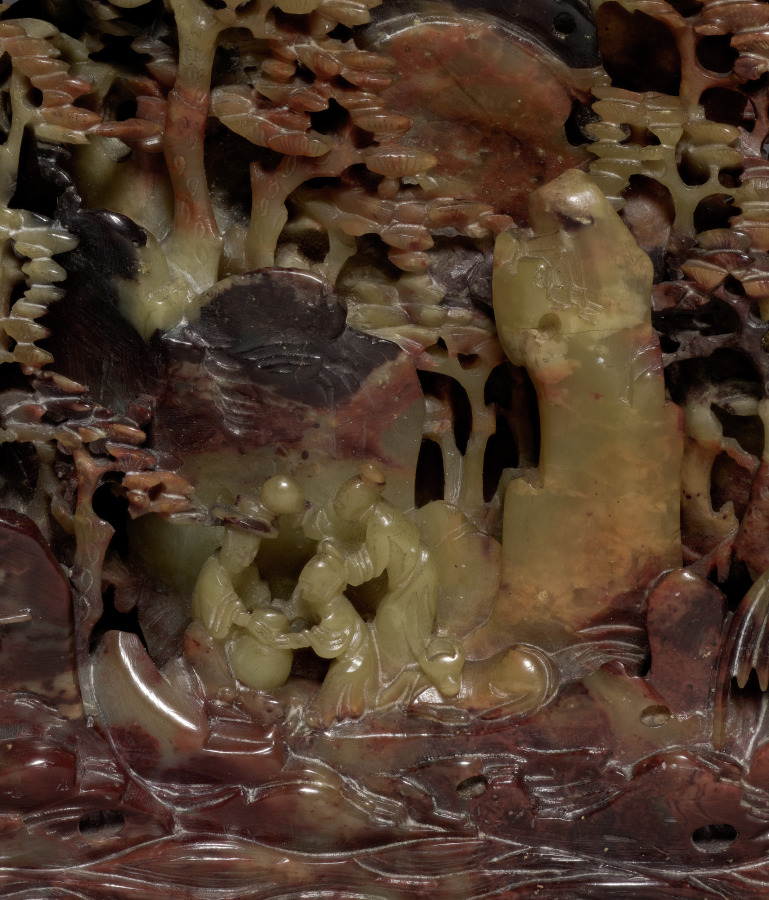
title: Landscape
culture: China, Qing dynasty (1644-1911)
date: 1644–1911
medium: soapstone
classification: Stone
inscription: 石門洞天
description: A mountain scenery surrounded by water and fish is meticulously carved out of soapstone, with a pond, bridge, waterfall, and temple front in its center. The unidentified figure scene on the left includes an ox and a man wearing what appears to be a Korean hat. A Buddha figure hidden in the depth of the temple can be glimpsed from the backside. The inscribed pillar on the right reads “Stonegate Cave to Heaven (shimen dongtian)”. Indentations all over the stone suggest that the miniature mountain was once adorned with precious stones and metal, presumably representing an earthly paradise to which one could escape in one’s mind and imagination.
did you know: A waterfall plummets down the cliff by the temple and then flows smoothly down to join the river at the front of the landscape scene.